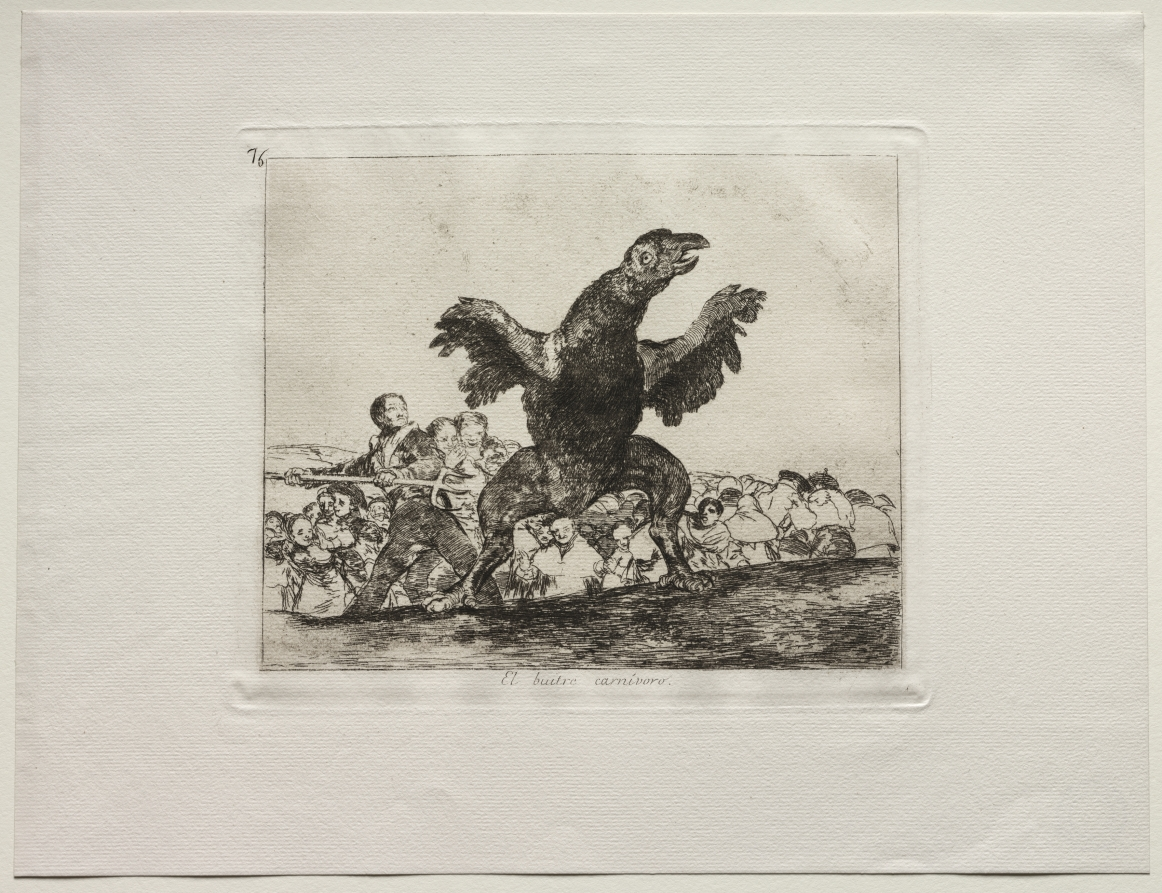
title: The Horrors of War: A Carnivorous Vulture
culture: Spain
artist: Francisco de Goya (Spanish, 1746–1828)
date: c. 1810–20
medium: etching and aquatint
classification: Print